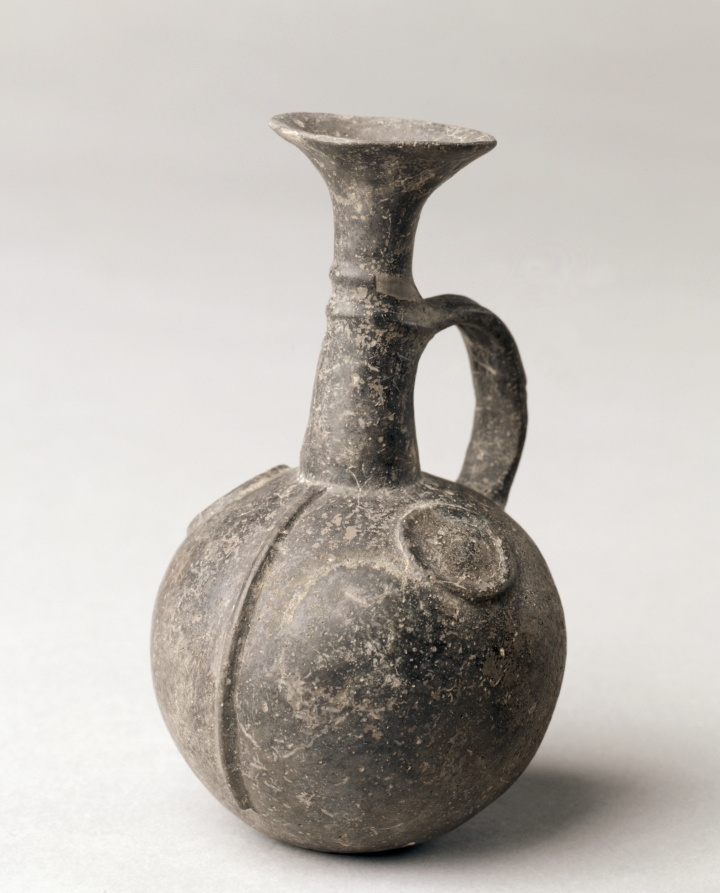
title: Jug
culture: Cyprus, late Cypriot I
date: c. 1600–1450 BCE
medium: base-ring ware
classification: Ceramic